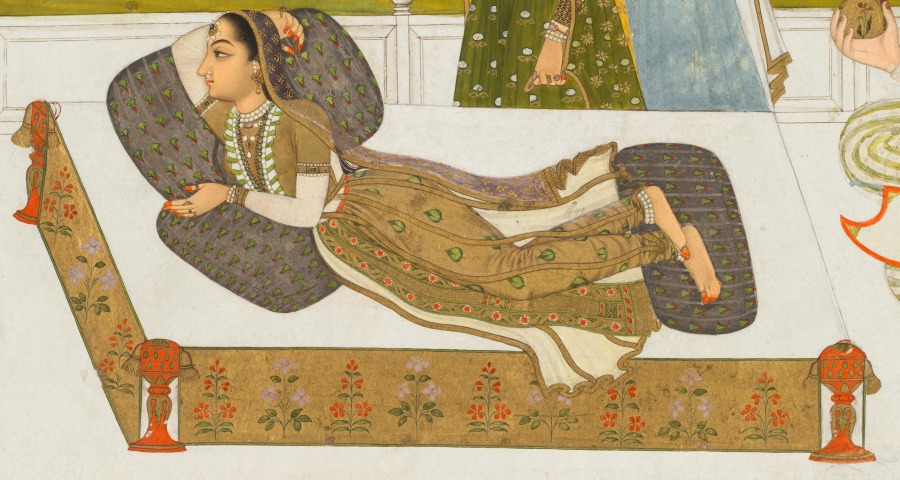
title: A princess reclining on a terrace with attendants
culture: India, Mughal, 18th century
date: c. 1730–1740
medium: Gum tempera and gold on paper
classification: Painting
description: This scene presents an idealized view of the life of a Mughal princess. Bejeweled and dressed in costly garments, she reclines on a couch set up on a white marble terrace. She watches two musicians sing and clap time, and a companion pours for her a cup of liquor. Two attendants stand behind, one waving a whisk to keep away the insects and another holding a box of paan, a betel-leaf preparation for freshening the breath. At the far right an older woman of the harem holds a fan while enjoying a hookah.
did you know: White is the color worn by widows.